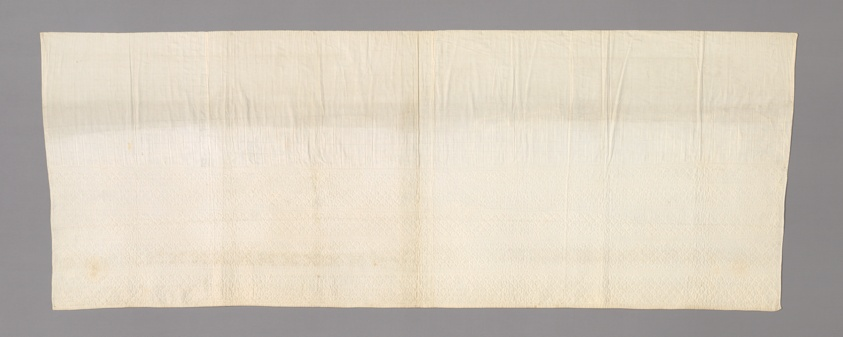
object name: Textile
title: Panel (From a Petticoat)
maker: England or France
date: 19th century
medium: Silk, bands of bunch, spider, and square netting; embroidered in cloth and overcast stitches; cotton cords with silk cut tassels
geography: England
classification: textile; needlework (visual works); costume